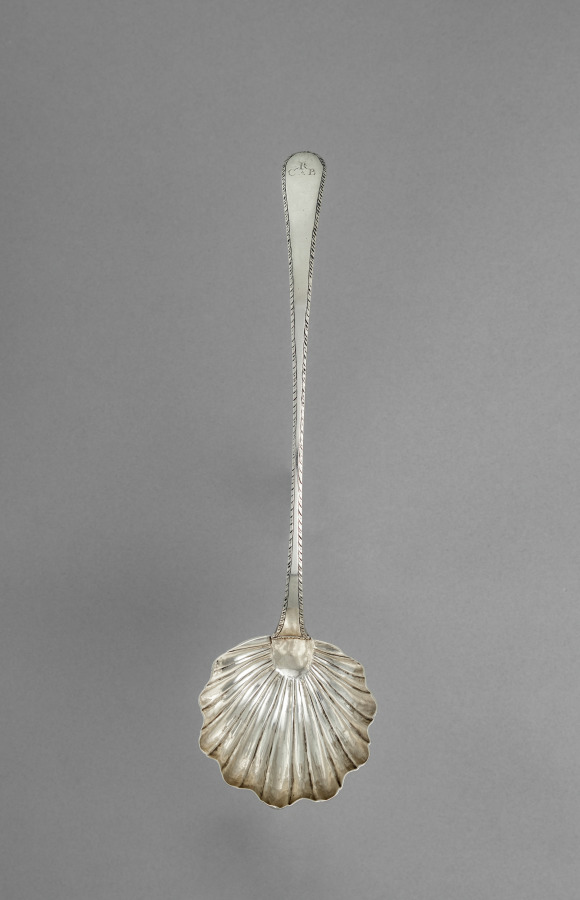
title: Soup Ladle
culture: America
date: c. 1780–1790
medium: silver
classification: Silver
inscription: engraved "R" over "C*B" in block letters on top of handle end.